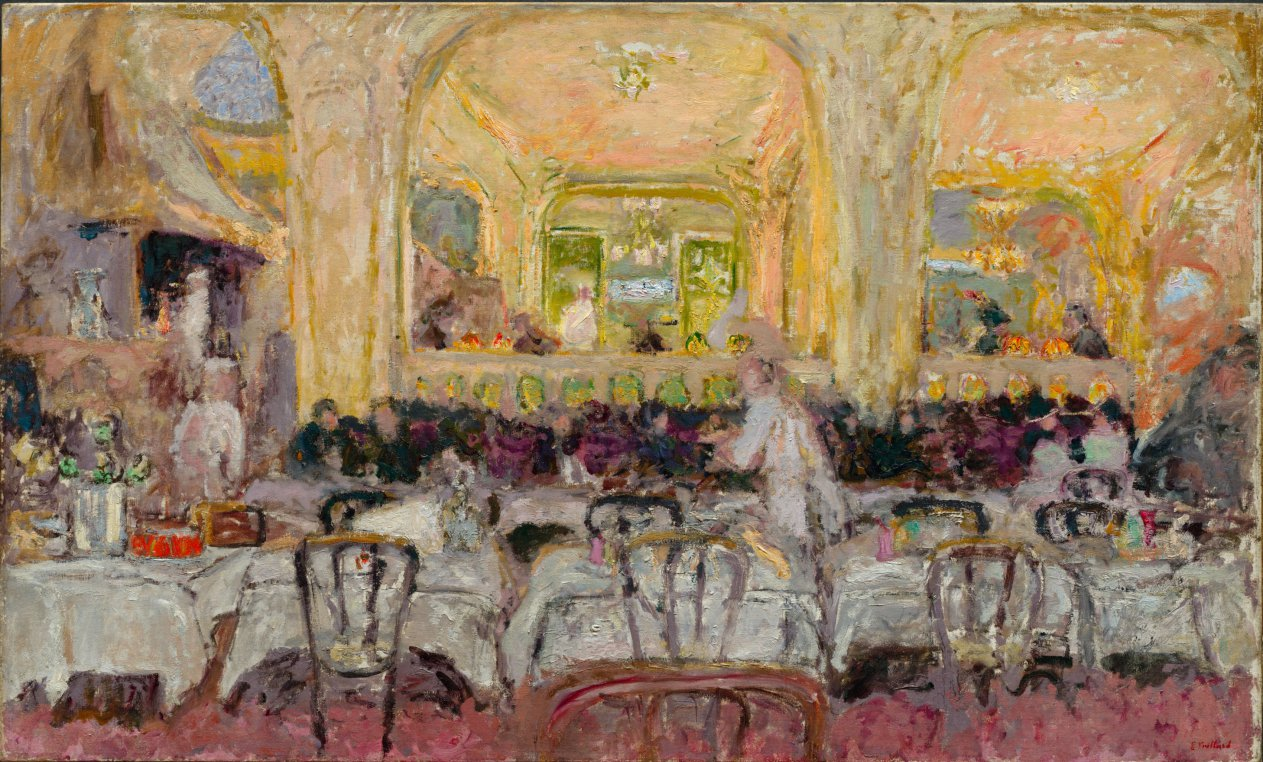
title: Café Wepler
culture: France, late 19th-early 20th Century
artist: Édouard Vuillard (French, 1868–1940)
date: c. 1908–10, reworked in 1912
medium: oil on fabric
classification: Painting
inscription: Signed bottom right in red (stamp?): E. Vuillard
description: The Wepler, a large brasserie restaurant on Place Clichy in the Montmartre district of Paris, is composed of several rooms on different levels. Once frequented by bohemian artists like Pablo Picasso and Amedeo Modigliani, the Wepler is still in business today.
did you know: Established in 1881, the Cafe Wepler is still in business. In the late 19th and early 20th centuries, it was frequented by artists and writers.